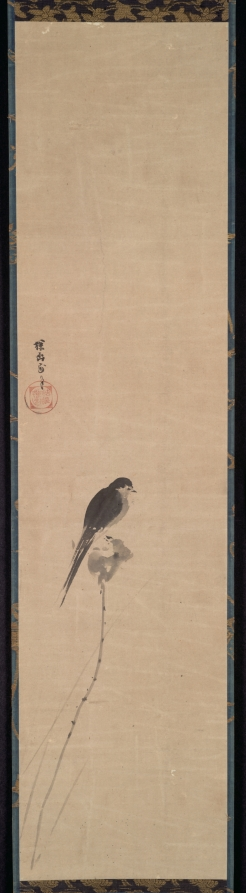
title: Bird on a Lotus Bud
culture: Japan, Edo period (1615–1868)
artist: Kano Tan’yū (Japanese, 1602–1674)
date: 1600s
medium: hanging scroll, ink on paper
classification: Painting